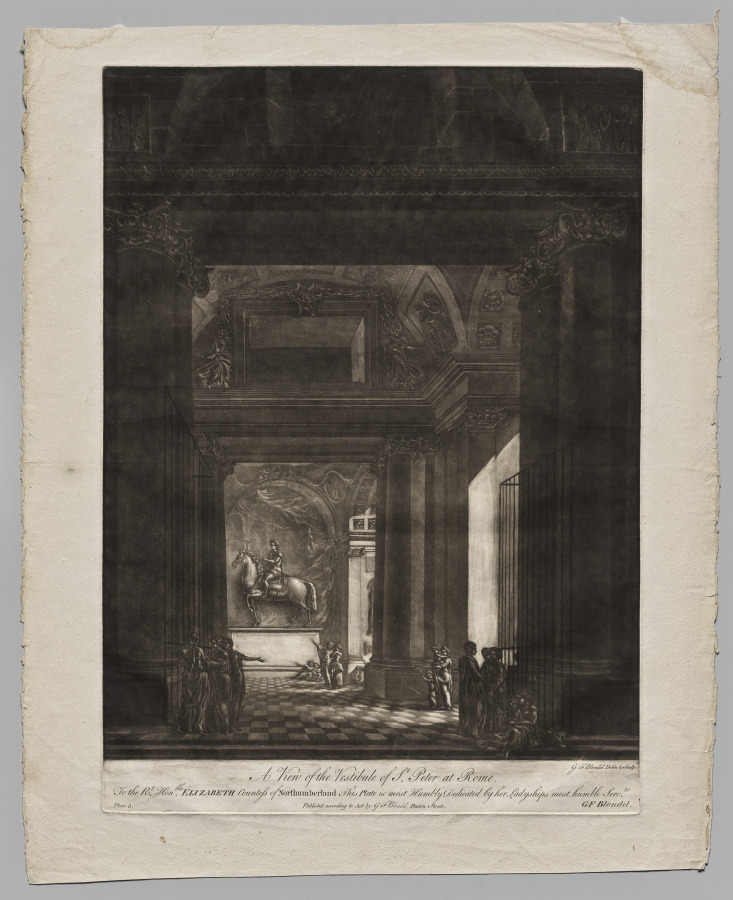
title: A View of the Vestibule of St. Peter at Rome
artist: Georges Francois Blondel (French, 1730–1800)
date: 1766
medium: mezzotint printed in black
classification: Print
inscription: Imprinted on rect: “A View of the Vestibule of St. Peter at Rome”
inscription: Imprinted on recto: “G.F. Blondel Delin & Sculp”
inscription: Imprinted on recto: “To the Rt Honble Elizabeth Countess of Northumberland This Plate is most Humbly Dedicated by her Ladyships most humble Srv’t/Published according to Act by G.F. Blondel Panton Street/GF Blondel/Plate 3”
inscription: Watermark: Grand-Jésus stock of T. Dupuy, watermark Name of Jesus (IHS), countermark T Dupuy Fin Auvergne 1742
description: After returning from several years spent in Italy, the French printmaker George-Francois Blondel settled in London in order to take advantage of the English taste for images of Italian sites. This is one of a series of eight prints he published in 1766 depicting imagined and real Italian interiors. Using the relatively new technique of mezzotint, which creates velvety, dark tonal areas, as well as low vantage points, Blondel created towering, awe-inspiring spaces. For special patrons, he printed the plates in sepia ink, rather than in black; the CMA’s set includes two of these unusual sepia impressions.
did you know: Mezzotint was relatively new at the time this print was made and had yet to be utilized for such large plates of an architectural nature as seen here.